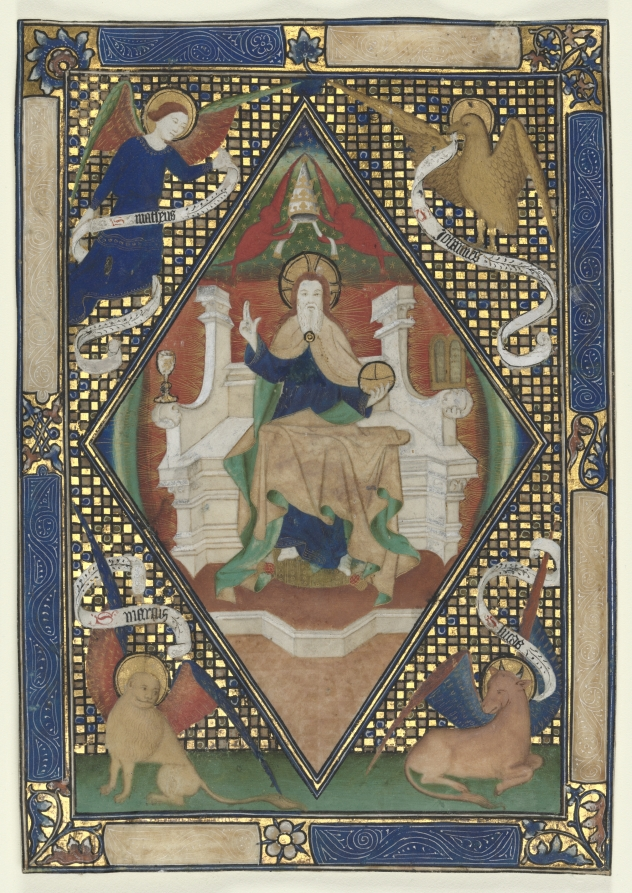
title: Canon Page from a Missal: Christ in Majesty with Evangelists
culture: France, Northeastern(?), 15th century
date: c. 1410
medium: ink, tempera, and gold on parchment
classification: Manuscript